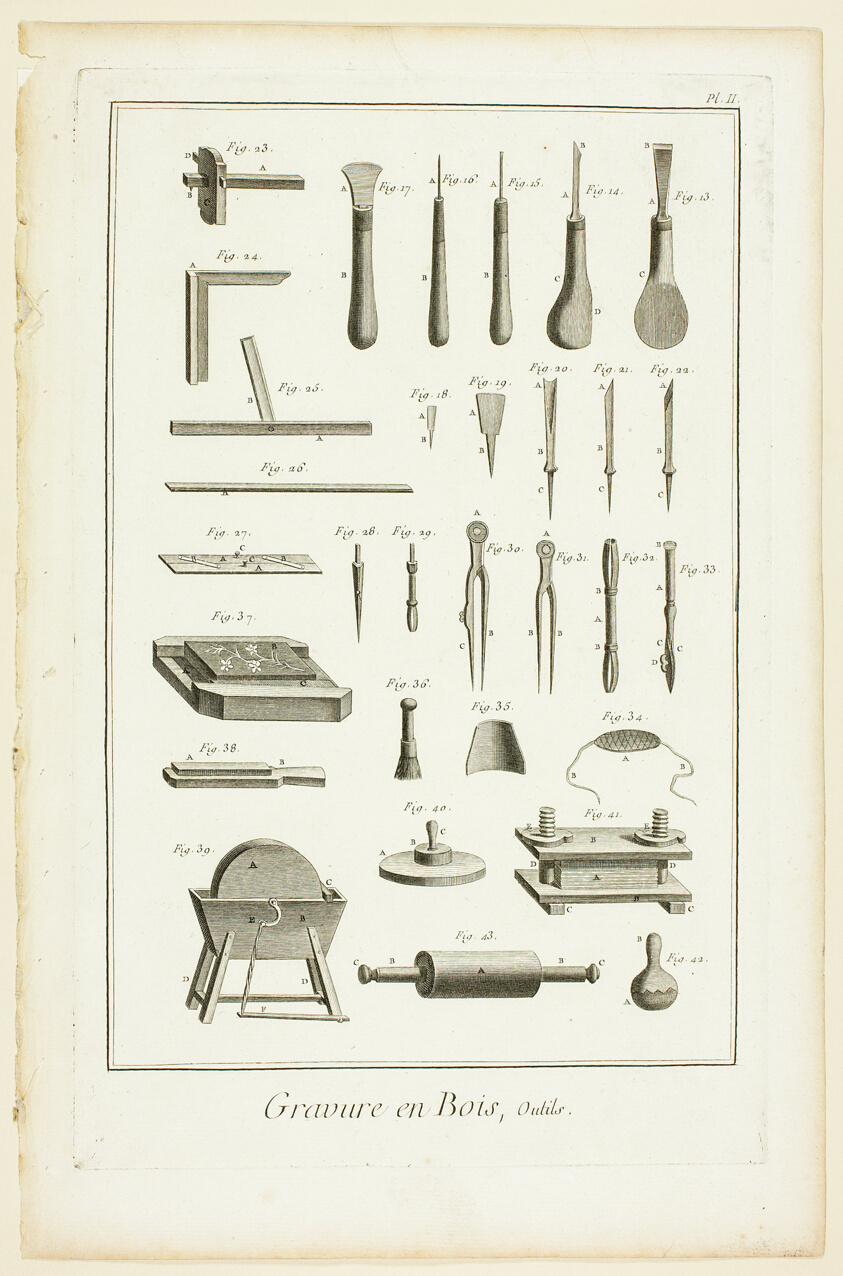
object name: Print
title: Wood Engraving, Tools, from Encyclopédie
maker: A. J. Defehrt (French, active 18th century); published by André le Breton (French, 1708-1779), Michel-Antoine David (French, c. 1707-1769), Laurent Durand (French, 1712-1763), and Antoine-Claude Briasson (French, 1700-1775)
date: 1762/77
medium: Engraving on cream laid paper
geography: France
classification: etching; print; prints and drawing